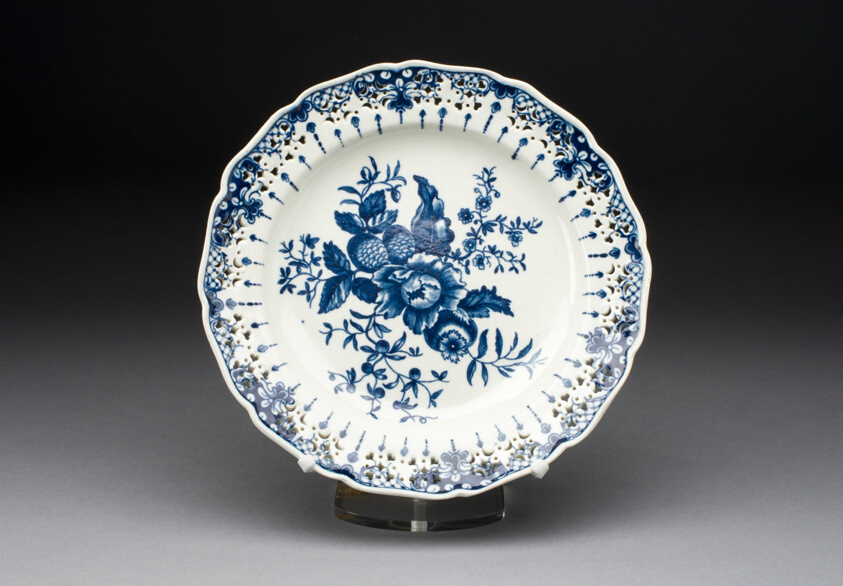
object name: Ceramics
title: Plate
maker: Worcester Porcelain Factory (Warmstry House Period, 1751–1783); Worcester, England, founded 1751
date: c. 1770/75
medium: Soft-paste porcelain, underglaze blue decoration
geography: Worcester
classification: plate (general, dish); dish (vessel); ceramics; porcelain; european decorative arts